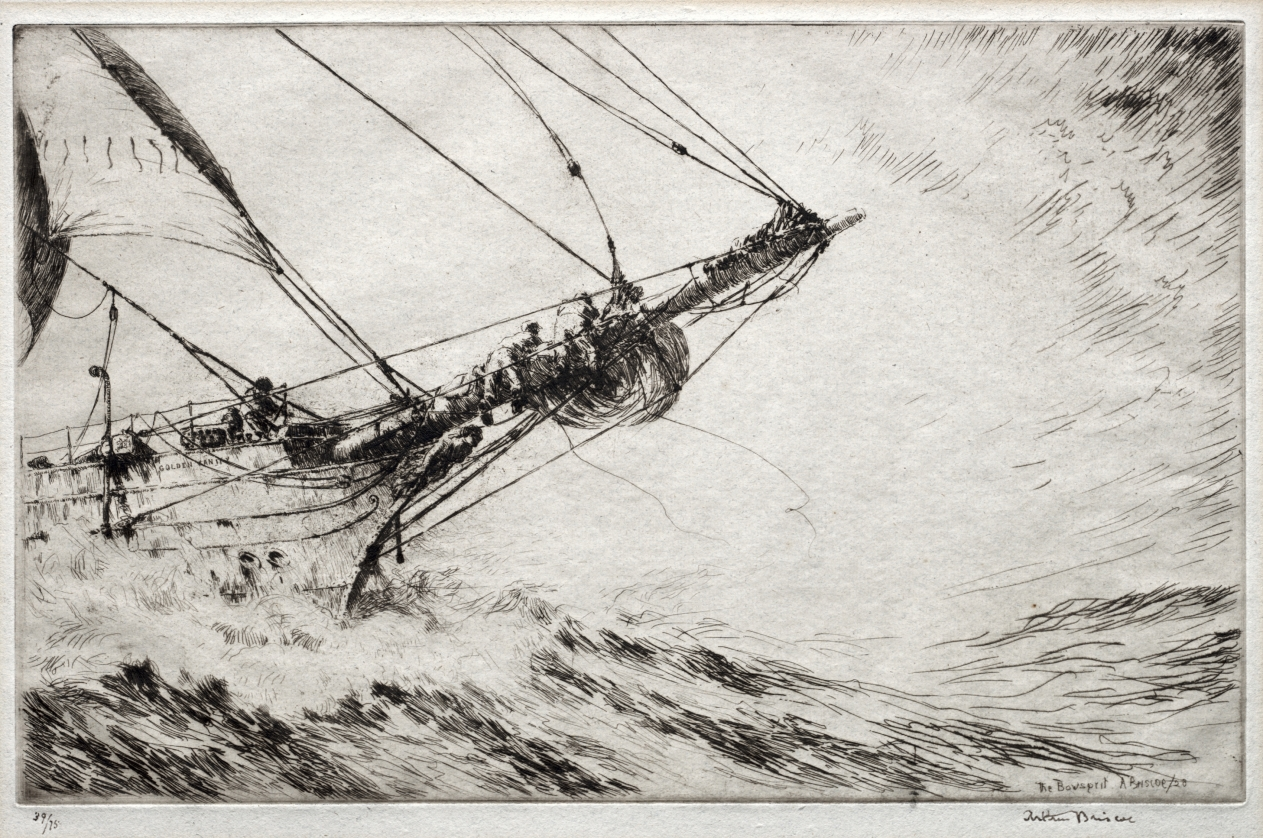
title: The Bowsprit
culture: England, 20th century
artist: Arthur John Trevor Briscoe (British, 1873–1943)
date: 1928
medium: etching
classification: Print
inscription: Lower margin, in ink: 39/75 Arthur Briscoe